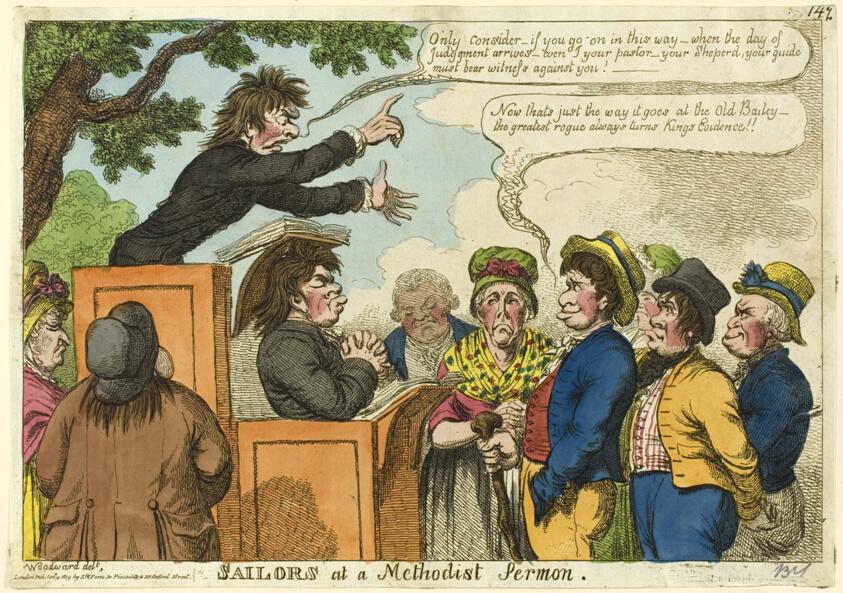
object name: Print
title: Sailors at a Methodist Sermon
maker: Unknown Artist (English, late 18th century); after George Moutard Woodward (English, c. 1760-1809); published by S.W. Fores (English, 1761-1838)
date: 1819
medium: Etching in black, with hand-colored additions, on cream wove paper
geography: England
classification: etching; print; prints and drawing